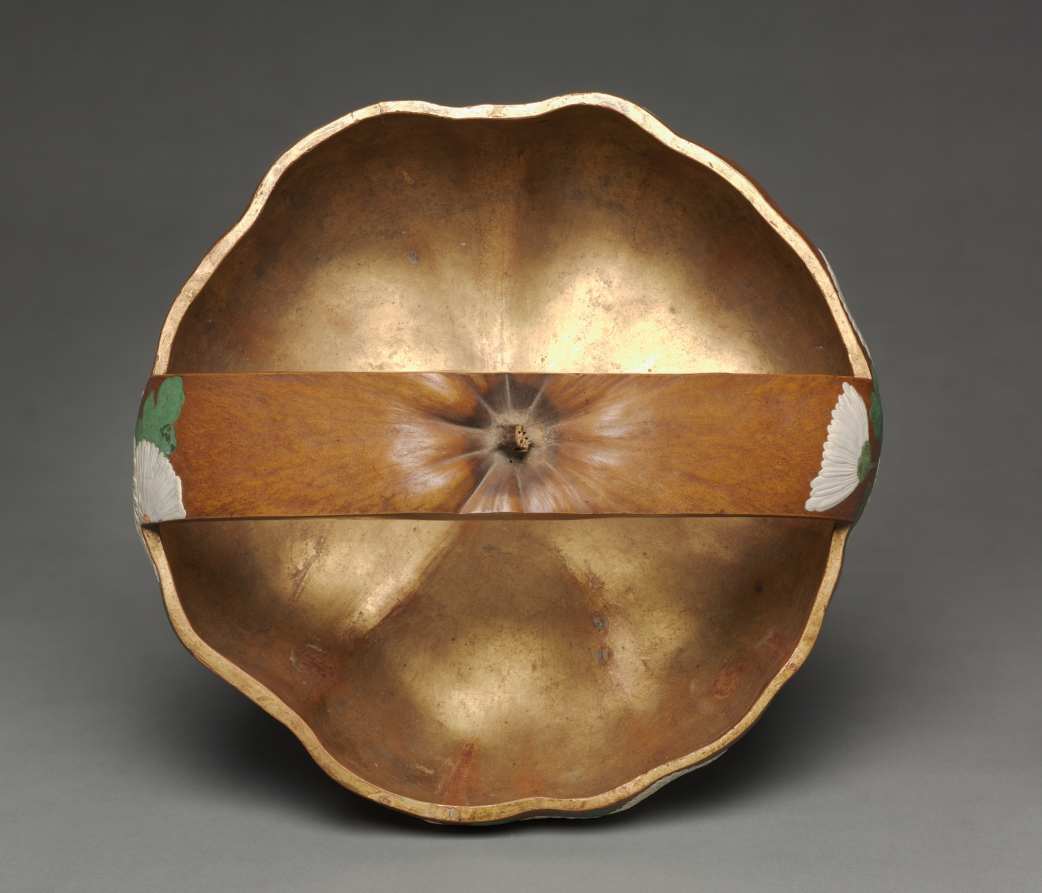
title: Gourd Basket with Chrysanthemum Design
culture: Japan, Edo period (1615–1868)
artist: attributed to Ogata Kōrin (Japanese, 1658–1716)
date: 1700s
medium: gourd; lacquered and painted with gesso, color, and gold pigments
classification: Miscellaneous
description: This very rare basket is made from a carved gourd and inscribed on the bottom with the signature of Ogata Korin (1658– 1716), a painter and lacquerer who founded the Rimpa school. Here, he applied the chrysanthemums with white gesso in relief. This basket is decorated with opaque green paint, and its inside is lined with gold.